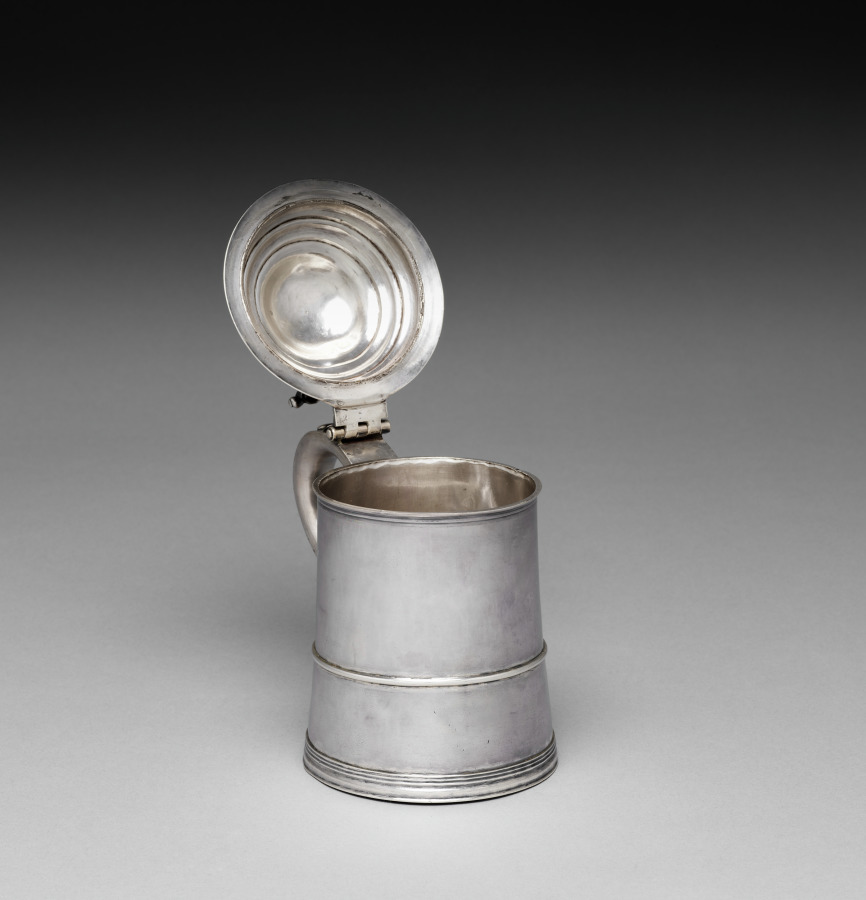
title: Tankard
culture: America, Massachusetts, Boston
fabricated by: Edward Winslow (American, 1669–1753)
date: c. 1725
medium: silver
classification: Silver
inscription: Engraved on handle: "R" over "I + D"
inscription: Stamped on side: "EV"